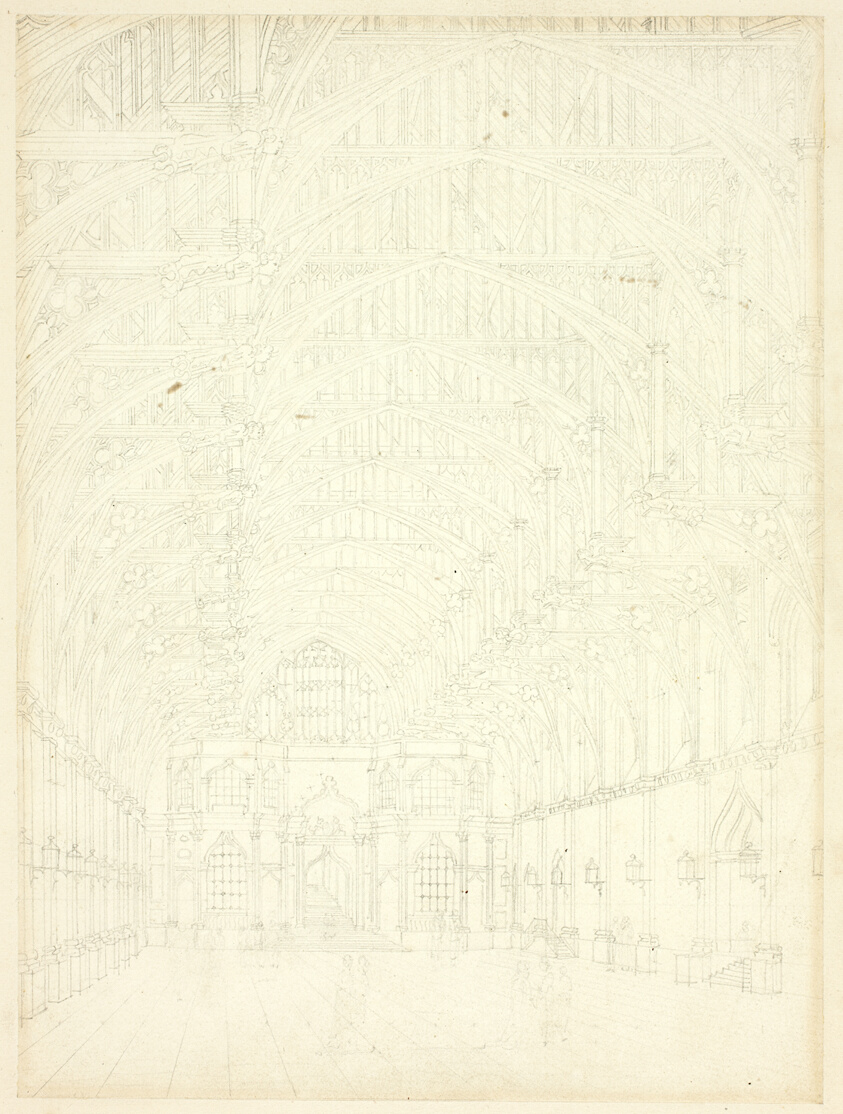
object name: Drawing and Watercolor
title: Study for Westminster Hall, from Microcosm of London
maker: Augustus Charles Pugin (English, born France, 1762-1832); Thomas Rowlandson (English, 1756-1827)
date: c. 1809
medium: Graphite on ivory wove paper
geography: England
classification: graphite; drawings (visual works); prints and drawing